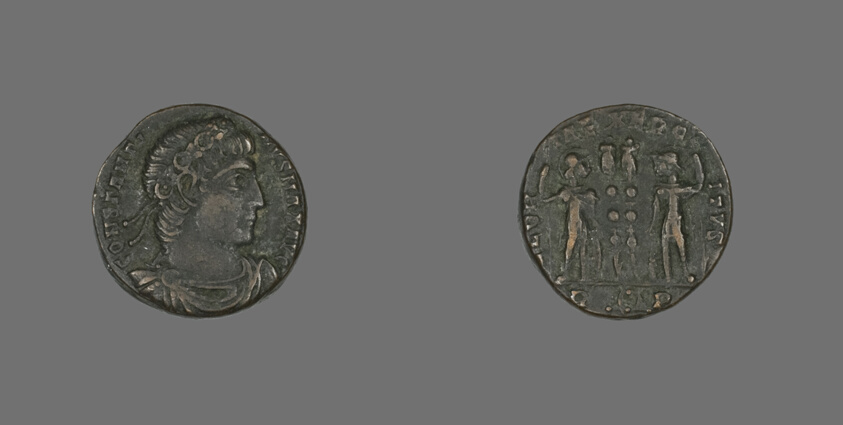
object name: Coin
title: Coin Portraying Emperor Constantine I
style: roman (ancient, style or period)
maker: Roman, minted in Rome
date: 333-335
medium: Bronze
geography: Roman Empire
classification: coin; ancient art